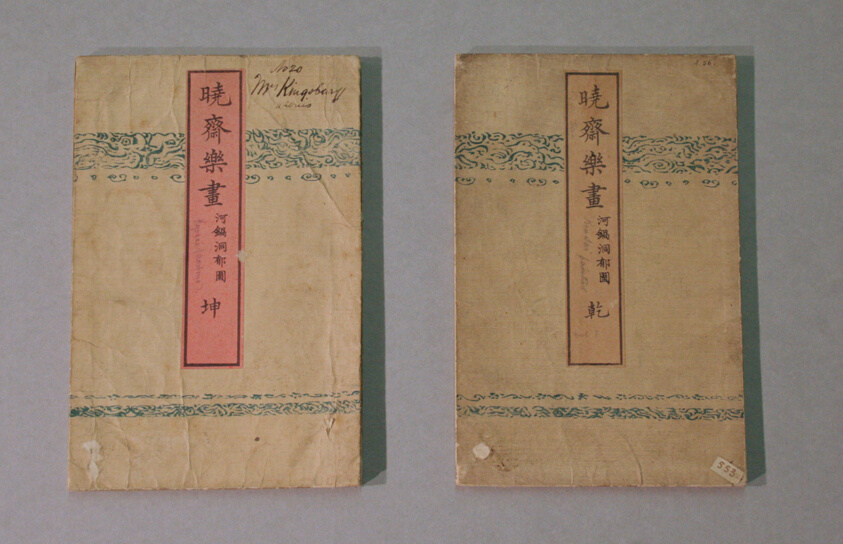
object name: Book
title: Kyosai rakuga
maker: Kawanabe Kyosai (1831-1889); Japanese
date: 1881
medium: Woodblock printed books, two volumes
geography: Japan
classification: book